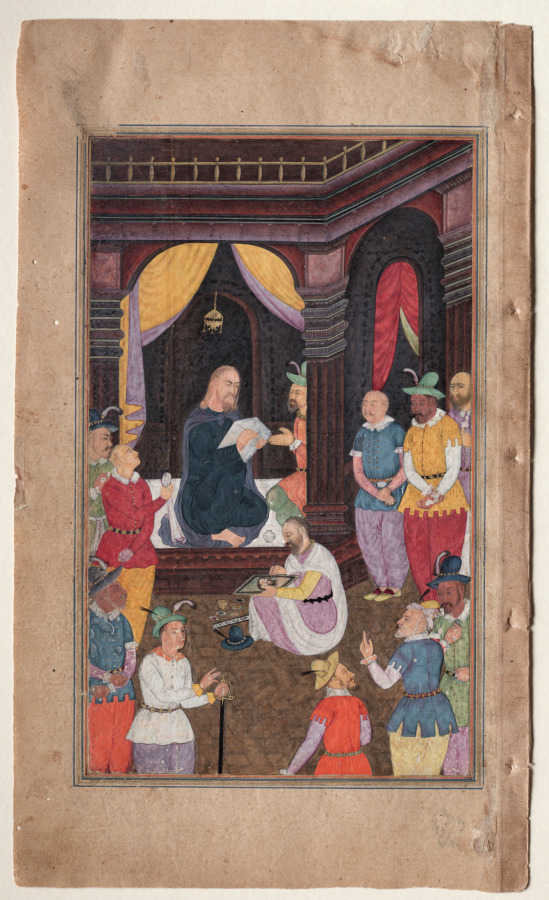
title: Jesus being portrayed by King Abgar’s painter (folio 143 recto), from a Mirror of Holiness (Mir’at al-quds) of Father Jerome Xavier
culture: Mughal India, Allahabad, made for Prince Salim (1569–1627)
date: 1602–4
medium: Gum tempera, ink, color, and gold on paper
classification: Manuscript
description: Jesus sits under a golden lamp with a cloth in his hand, while an artist sits before him, struggling to paint his portrait. The artist had been sent by his king, Abgar of Edessa, who was ill and believed the portrait would cure him. Jesus pitied the artist and pressed his face to the cloth to create a perfect impression. The miraculous cloth became known as the Mandylion and was venerated by Christians as a relic of Christ. The similarity between the names Abgar and Akbar suggests that Father Jerome included this noncanonical story in his biography of Jesus to resonate with and inspire the Mughal emperor.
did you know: Artist’s pigments are arranged in shells next to the brass cup for water.